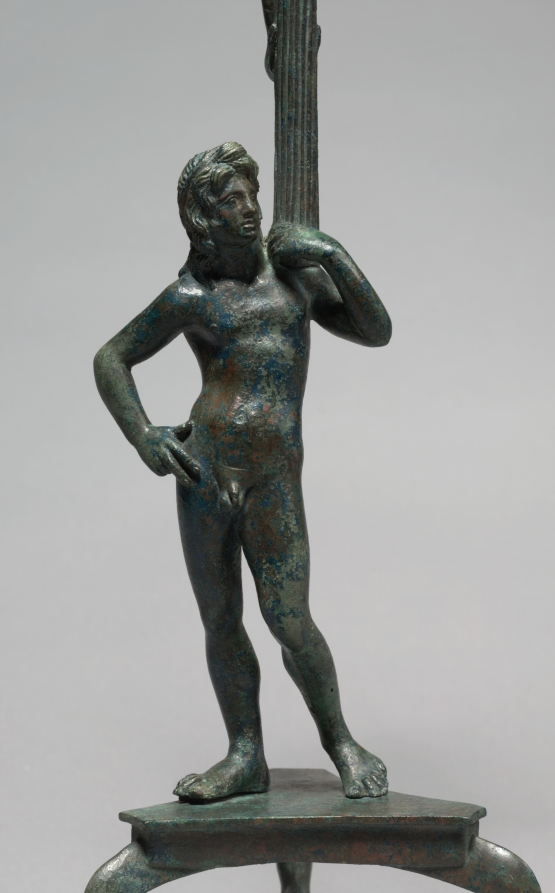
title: Incense Burner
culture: Etruscan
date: 100s BCE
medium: bronze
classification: Metalwork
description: Both elaborate and functional, the Etruscan thymiaterion, or incense burner, typically comprises at least three main parts—tripod stand, shaft, and, at the top, a shallow bowl for incense. Often, a figural support is incorporated, here in the form of a youthful male nude, perhaps the wine god Dionysos. Below him, the tripod stand features cloven hoofs, while above him a spotted cat or panther climbs toward a rooster or other crested bird. Holes in each corner of the square upper plate likely held additional animals or other ornaments.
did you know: The circular depression on the top of this object likely held incense.